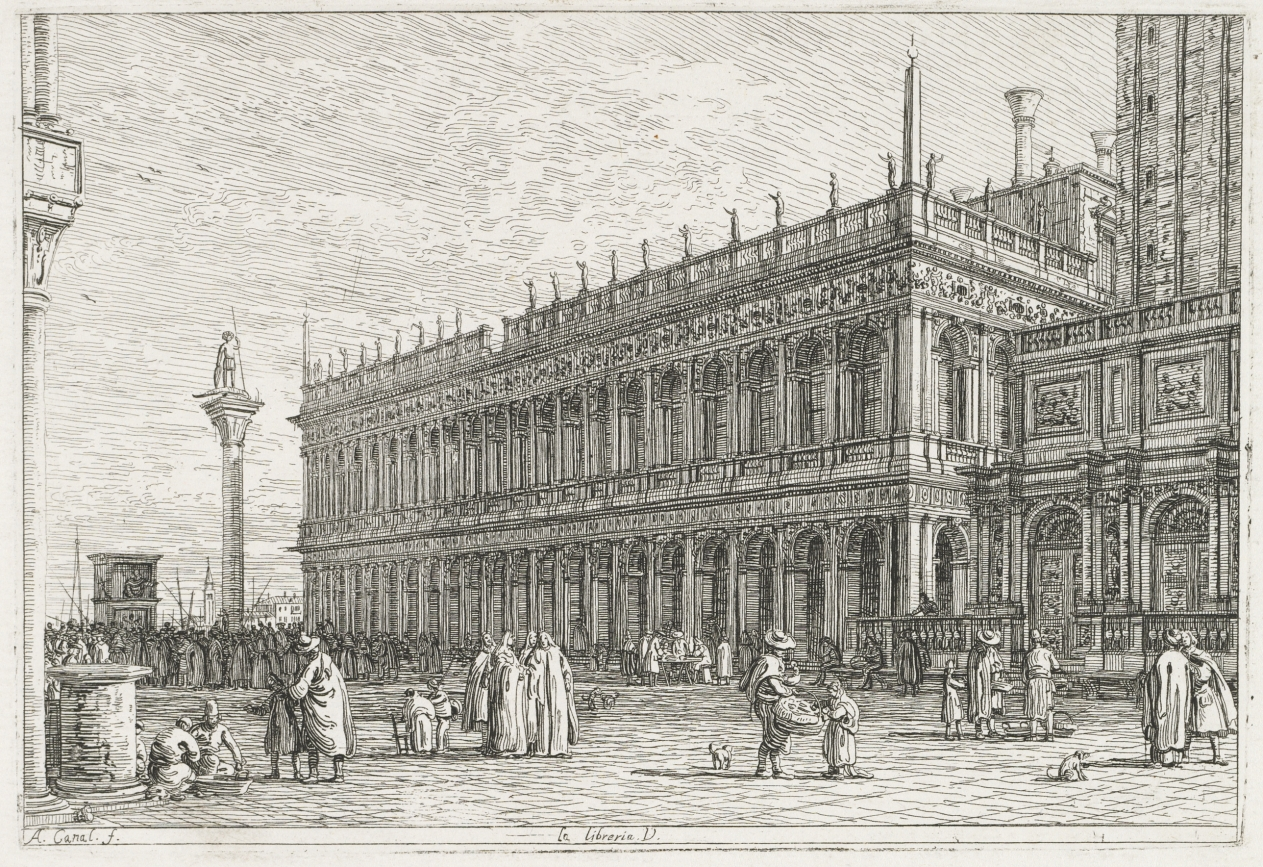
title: Views: The Library, Venice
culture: Italy, Venice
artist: Antonio Canaletto (Italian, 1697–1768)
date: 1735–1746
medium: etching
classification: Print